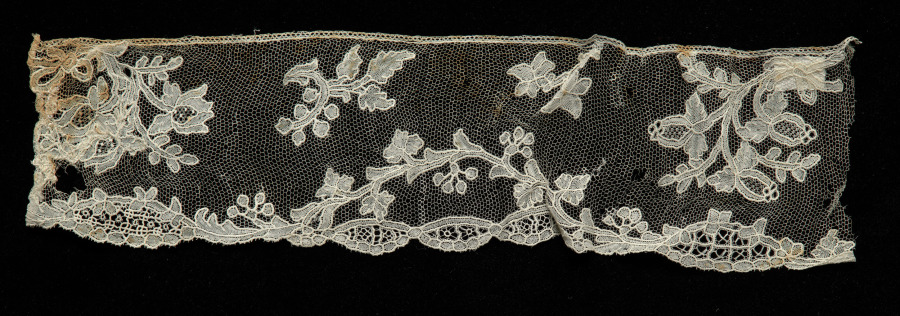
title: Fragment of Lace Edging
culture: Italy, Burano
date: 1700s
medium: Linen: needle lace (Burano Point)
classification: Lace